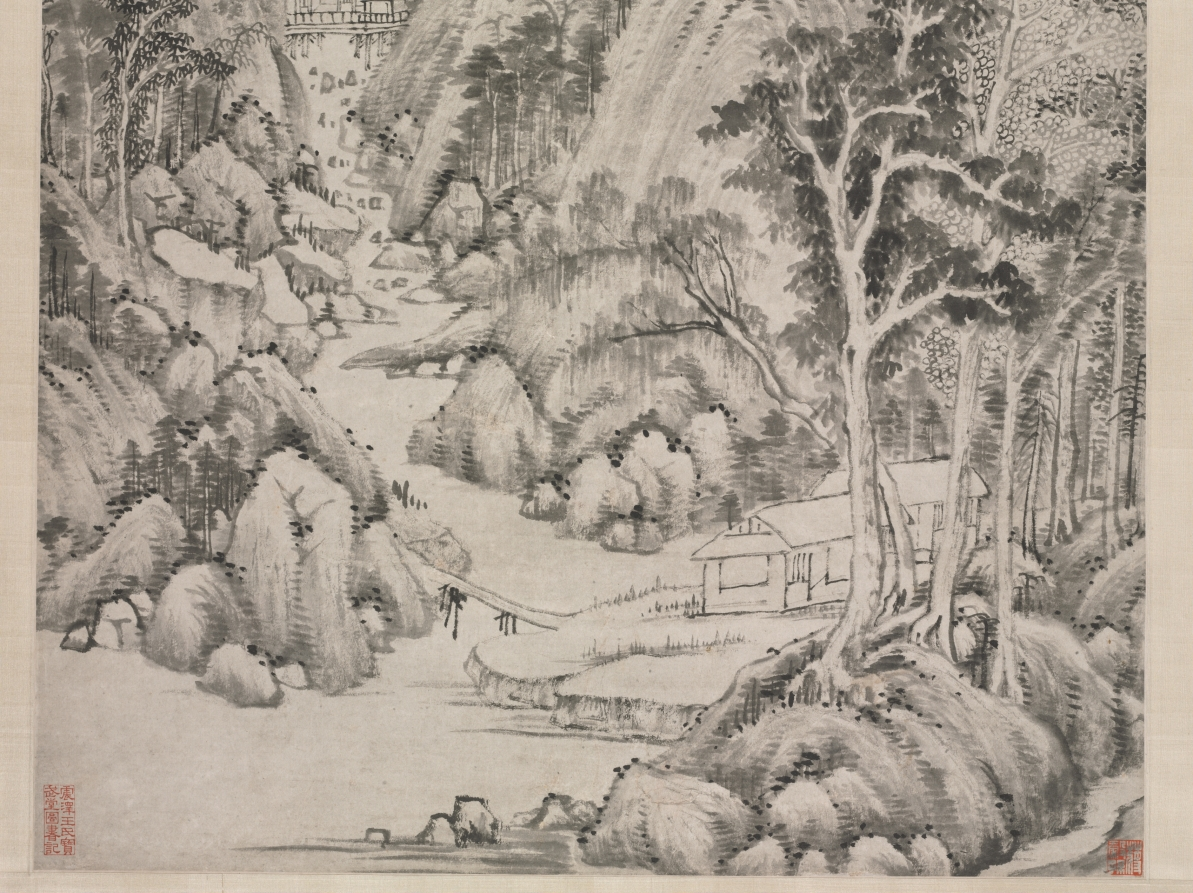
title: Mountain Village Embraced by the Summer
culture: China, Qing dynasty (1644-1911)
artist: Wang Shimin (Chinese, 1592–1680)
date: 1659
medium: hanging scroll, ink on paper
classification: Painting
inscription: Artist's inscription, signature, and 3 seals: [seal] Ouxie 偶諧. In the jihai year [1659], the fourth lunar month, I painted this for T'o-weng, my senior in our literary club, for your amusement and correction. Your junior Wang Shimin. [seals] Wang Shimin yin 王時敏印; Xunzhi 遜之.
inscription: 2 additional seals: 1 of Jiang Gusun [Chiang Ku-sun] 將穀孫 (20th century); 1 of C. C. Wang 王季遷 (1907–2003).